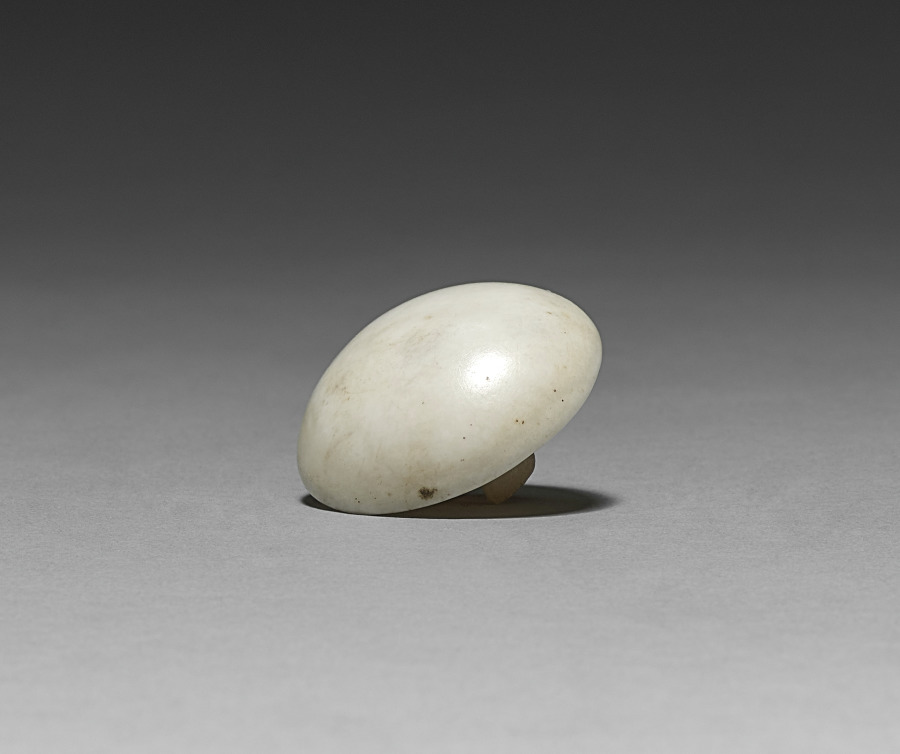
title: Ear Stud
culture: Egypt, New Kingdom (1540–1069 BCE), Dynasty 18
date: 1540–1296 BCE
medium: travertine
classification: Jewelry